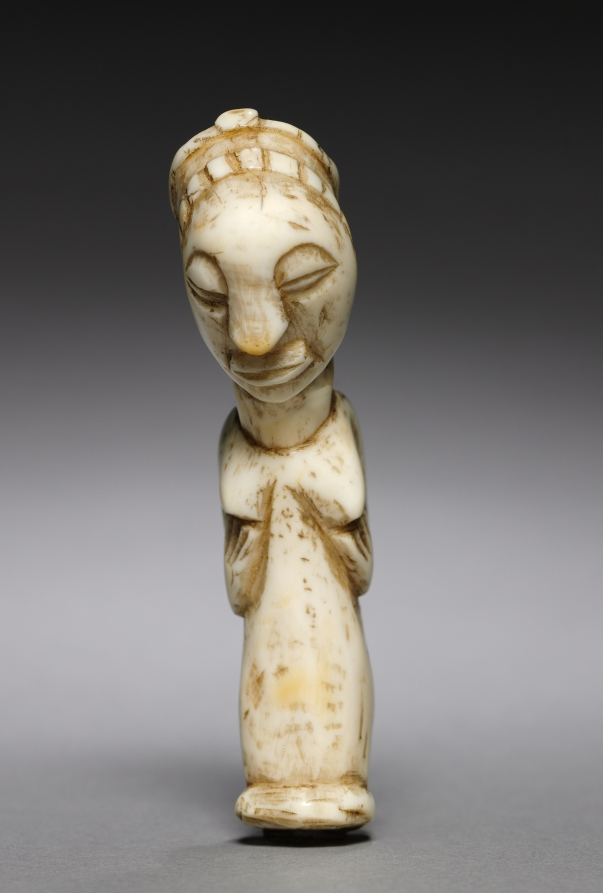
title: Figure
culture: Central Africa, Democratic Republic of the Congo, Luba, 20th century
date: 1900s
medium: ivory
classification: Sculpture